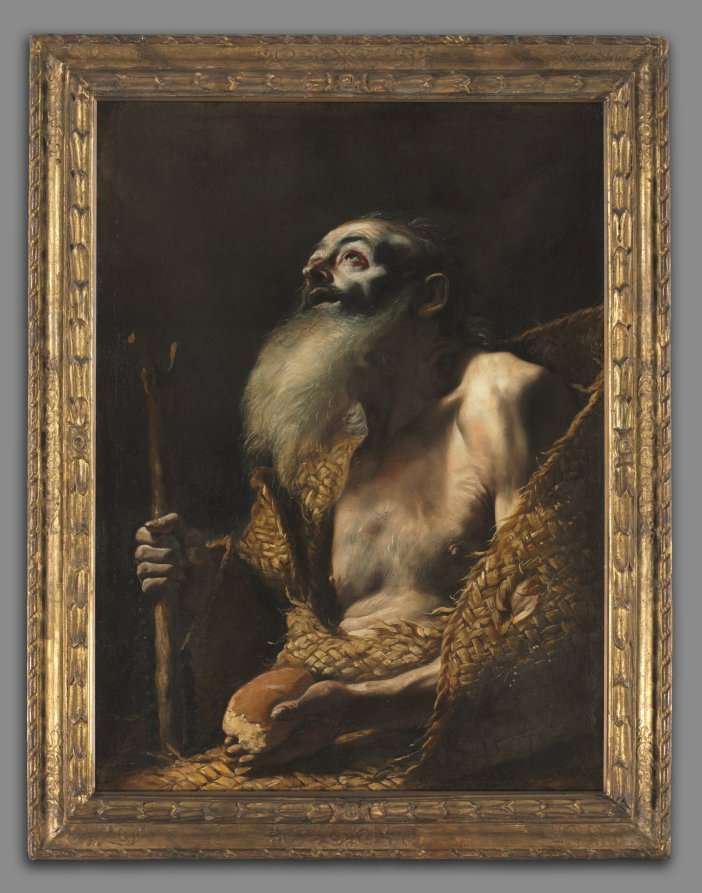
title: Saint Paul the Hermit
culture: Italy, 17th century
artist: Mattia Preti (Italian, 1613–1699)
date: c. 1662–1664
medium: oil on canvas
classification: Painting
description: After training in Rome in the 1630s and 1640s, Preti went to Naples where he continued working in a mode inspired by the work of Caravaggio. In this painting, dramatic lighting and intense naturalism depict the intersection of the heavenly and earthly realms. According to Catholic tradition, Saint Paul the Hermit fled into the desert to escape persecution from the Romans in the third century, and is revered as the first of many hermit saints. A raven brought Saint Paul a half a loaf of bread daily, which enabled him to survive to the age of 113 years. Preti depicted the saint looking heavenward in appreciation and awe of his heavenly provider.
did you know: Clothed only in a rough woven cloth, Paul's suffering drew him spiritually closer to Christ.